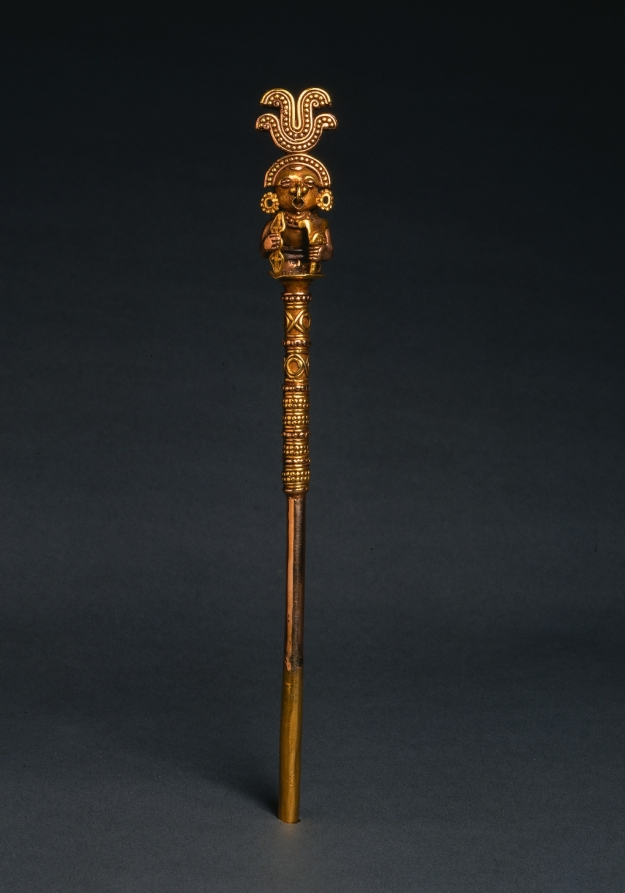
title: Lime Dipper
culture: Colombia, Calima region, Yotoco style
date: c. 1–800 CE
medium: gold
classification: Metalwork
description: Coca-leaf chewing was a widespread ritual in ancient South America. Utensils included a container and a dipper or spoon for powdered lime (made from seashells), added to the coca to enhance its gentle, stimulating effect. Colombian cultures are especially known for transforming these utensils into works of art made of precious metal. The image on the tallest dipper is wonderfully complex. A serpent coils at the bottom, beneath a snarling animal with a huge, vertical tail. This animal has a tiny monkey on its back; the monkey also has a huge tail, which rests on the first animal's head like a headdress. This intricate image was created with the lost-wax casting process.